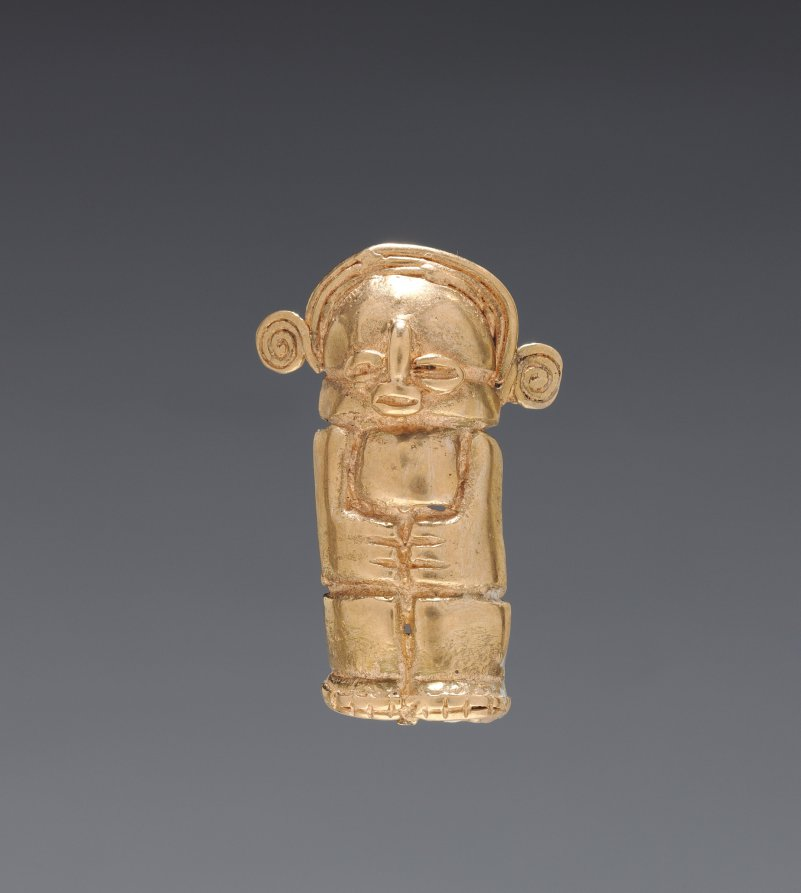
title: Necklace Figurine Bead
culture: Colombia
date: 1–700 CE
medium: cast gold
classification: Jewelry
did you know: Working with gold dates back to at least 500 BC in Ecuador and Colombia.